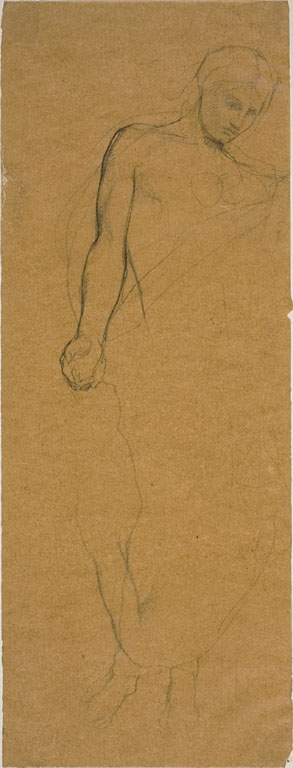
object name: Drawing and Watercolor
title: Study of a Standing Draped Figure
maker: Jules-Élie Delaunay (French, 1828-1891)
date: 1850/60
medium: Graphite on tan wove paper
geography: France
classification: graphite; drawings (visual works); prints and drawing